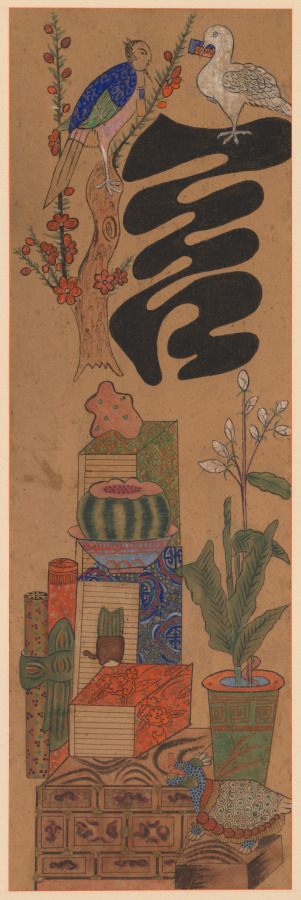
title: Munja-Chaekgeori Screen (Character-Books Screen)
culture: Korea, Joseon dynasty (1392–1910)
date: early 1900s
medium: Eight-panel folding screen, ink on paper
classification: Painting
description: This folding screen is a whimsical harmony of two different subjects: chaekgeori, or books and things; and munja, or characters. The lower section of each panel depicts the imagery of things, including books, decorative arts, and utilitarian objects. The upper portion of each panel bears a classical Chinese character. Read from far right to left, the eight characters refer to the values of Confucian teachings of the Joseon dynasty: filial piety, brotherly love, loyalty, trust, propriety, righteousness, modesty, and humility. While these two pictorial genres are harmoniously conjoined on the same picture plane, two sharply contrasting world views—urban consumerism and traditional Confucian ethics that despise materialism—compete with one another.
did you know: The eight Korean characters each mean filial piety, brotherly love, loyalty, trust, propriety, righteousness or justice, modesty or integrity, and humility or the feeling of shame.